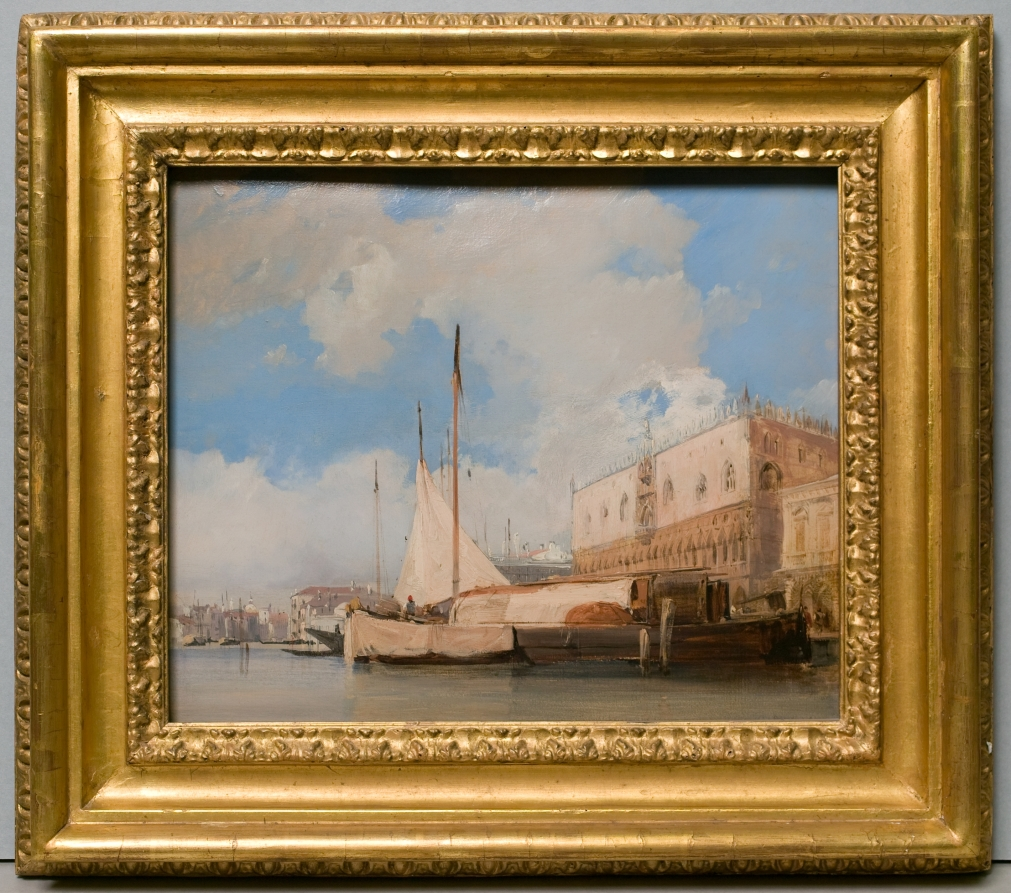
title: The Doge's Palace, Venice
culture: England, 19th century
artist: Richard Parkes Bonington (British, 1802–1828)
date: 1826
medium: oil on millboard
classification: Painting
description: At the age of 22, Bonington achieved overnight success at the official (state sponsored) Paris exhibition known as Salon. Two years later, in 1826, he journeyed to Venice, a city that had long attracted landscape artists. At first, constant rain greatly depressed Bonington, but suddenly the weather changed and Venice was at its glorious best. Bonington frequently painted outdoors, capturing immediate impressions of Venetian architecture and sunlight. He made this particular study from a boat anchored in the lagoon near the Doge's Palace. The thick swirls of paint, with colors mixed together while still wet, indicates how rapidly the artist worked.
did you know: At age seventeen, Bonington began teaching precision drawing at the École des Beaux Arts in Paris and he was essential to bringing aspects of the English style to France.